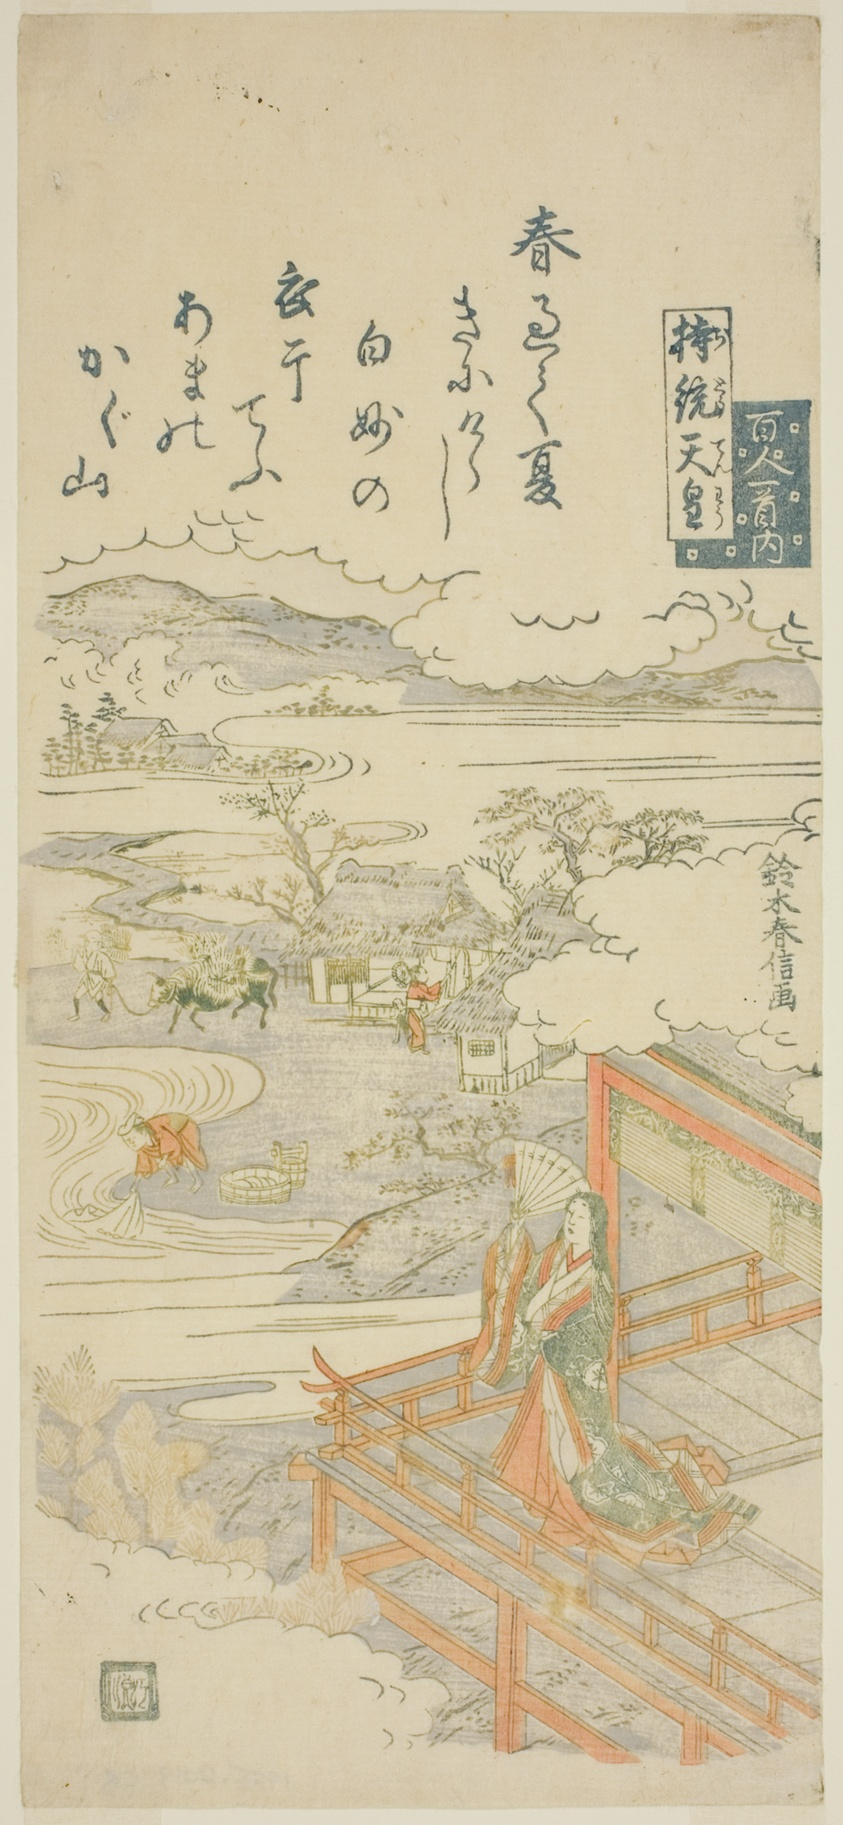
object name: Print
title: Empress Jito (Jito Tenno), from the series "One Hundred Poems by One Hundred Poets (Hyakunin isshu no uchi)"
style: Japanese (culture or style)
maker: Suzuki Harunobu 鈴木 春信; Japanese, 1725 (?)-1770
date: c. 1763/64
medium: Color woodblock print; hosoban, mizu-e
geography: Japan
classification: woodblock print; print; asian art